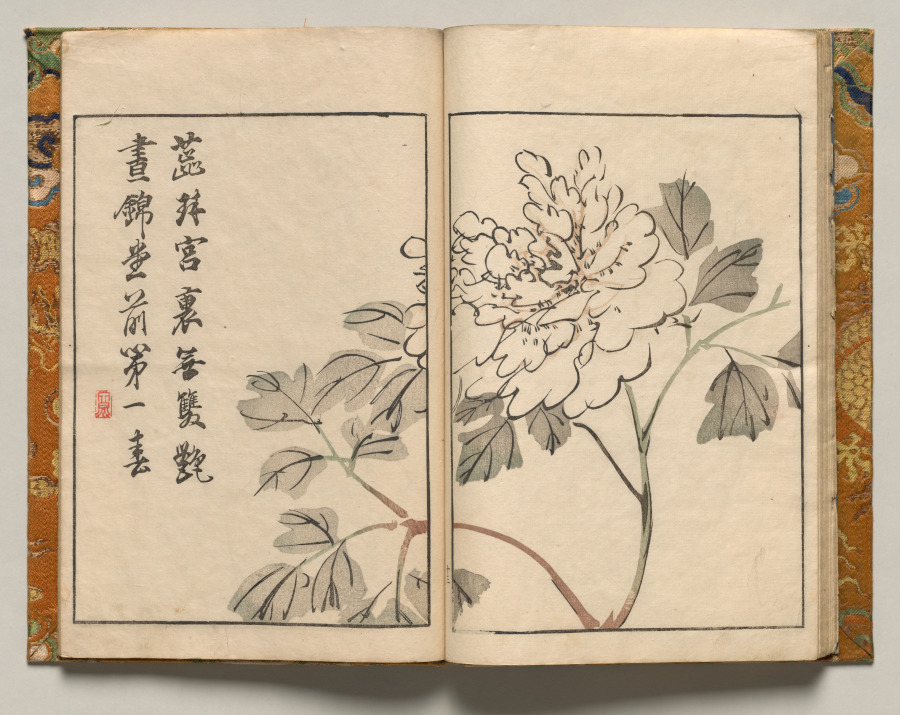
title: Peony with Poem, Design Thirteen from Shazanrō Picture Book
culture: Japan, Edo period (1615–1868)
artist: Tani Bunchō (Japanese, 1763–1841)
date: 1816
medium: woodblock-printed book; ink and color on paper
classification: Bound Volume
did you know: Shazanrō was one of Tani Bunchō's style names.